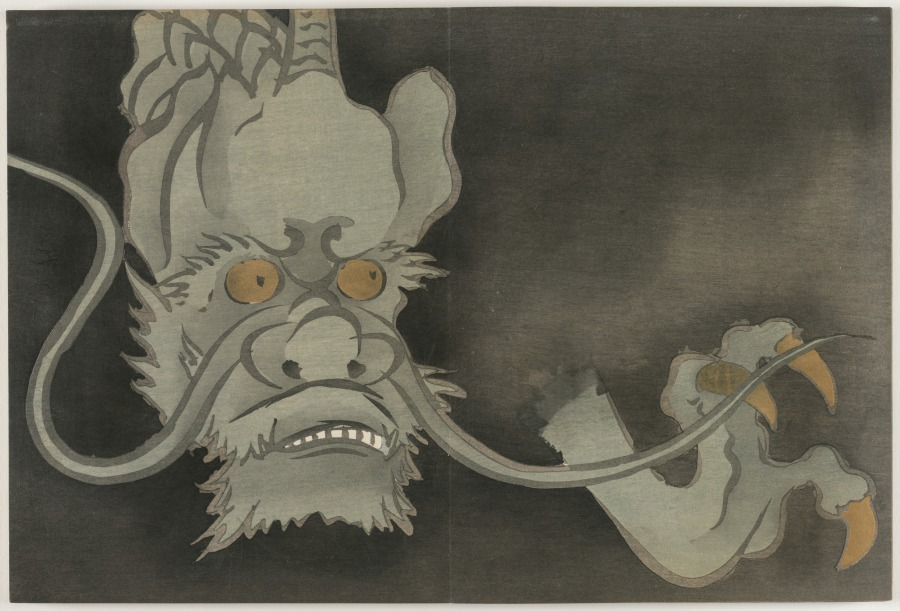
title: Flowers of a Hundred Worlds (Momoyogusa): Dragon (Ryū)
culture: Japan, Meiji period (1868–1912)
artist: Kamisaka Sekka (Japanese, 1866–1942)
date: 1909–10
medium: color woodcuts with gold and silver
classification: Bound Volume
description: This print from a set of three woodblock printed albums displays the graphic design prowess of Kamisaka Sekka. The images were first distributed one by one to subscribers to the series but later were reissued in bound form, like this book, for mass consumers. Each print features a vignette taken from nature or Japanese literature. Many of the scenes have a long history in Japan, originating in the 900s or 1000s and having been interpreted by all manner of artists since that time. Sekka’s selections hew closely to precedents from the Rinpa style originated by painter Tawaraya Sōtatsu (c. 1570–c. 1640) and calligrapher Hon’ami Kōetsu (1558–1637).